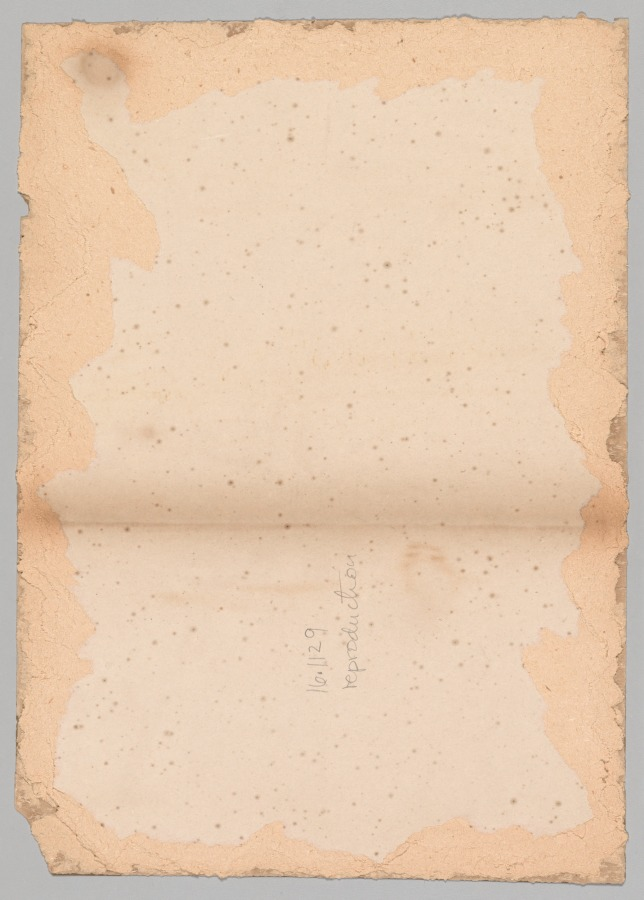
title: Kiyomizu Komachi from the series Little Seedlings: Seven Komachi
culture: Japan, Edo period (1615–1868)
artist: Kitagawa Utamaro (Japanese, c. 1754–1806)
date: c.1803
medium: color woodblock print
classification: Print